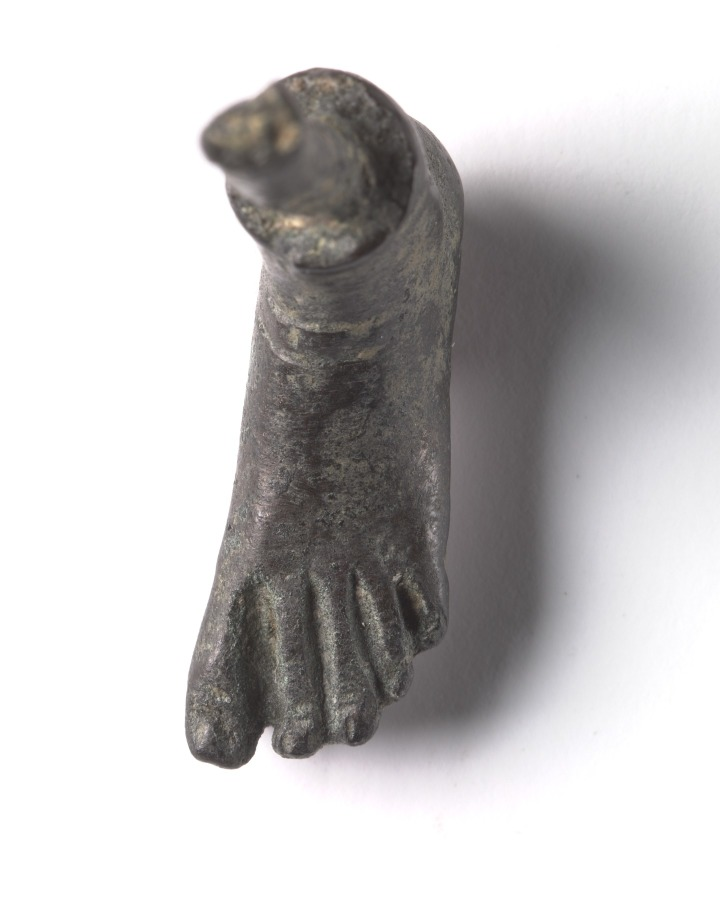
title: Bronze Mount from a "Shawabty Bundle": Left Foot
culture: Egypt, Thebes, Wadi Qubbanet el-Qirud, New Kingdom (1540–1069 BCE), Dynasties 18–19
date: c. 1336–1256 BCE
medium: bronze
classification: Funerary Equipment